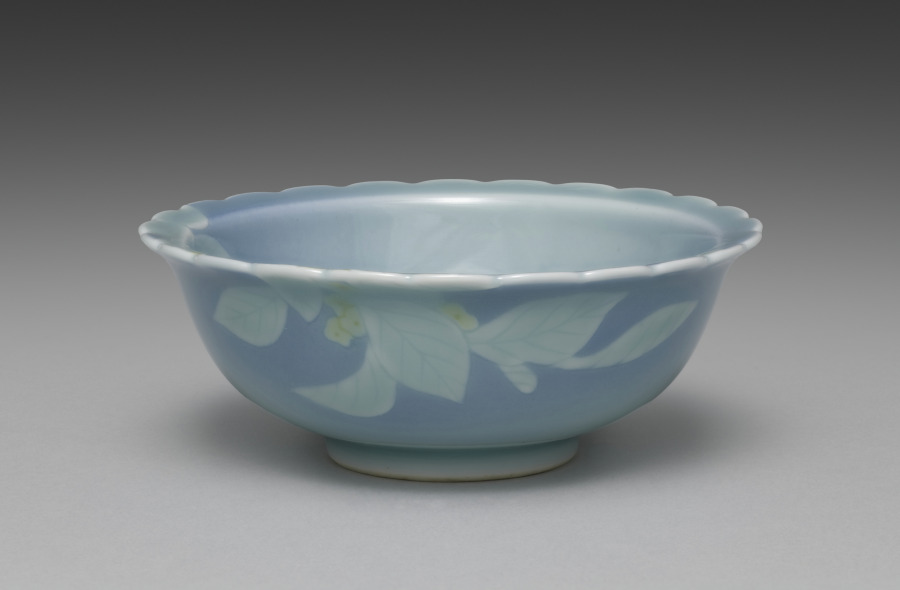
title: Dish from Dishes with Flowers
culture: Japan, Taishō period (1912–26) or Shōwa period (1926–89)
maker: Seifū Yohei IV (Japanese, 1872–1951)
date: 1914–46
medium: One from a set of five dishes; porcelain with underglaze yellow and blue glaze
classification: Ceramic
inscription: 清風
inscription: 清風造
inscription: 成山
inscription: 清風盧人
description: One can imagine a cool summer breeze when looking at this set of dishes, each shaped with a crenulated mouth and glazed with blue. Around the rim and into the basin, the bowls have low-relief designs of flowers with underglaze yellow petals; their leaves and stems show white through the glaze. On each dish, the design continues over the rim onto one side.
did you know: Seifū Yohei IV’s dishes with flowers feature underglaze yellow.